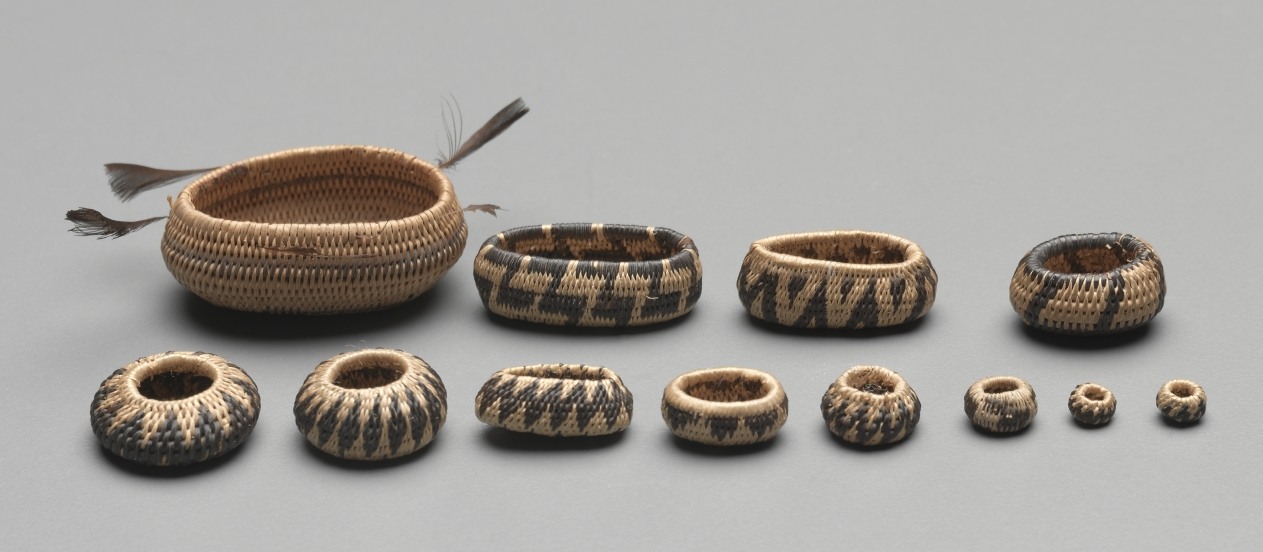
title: Miniature Rhomboidal Basket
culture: California, Pomo, 20th century (?)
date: Early 1900s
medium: coiled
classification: Basketry